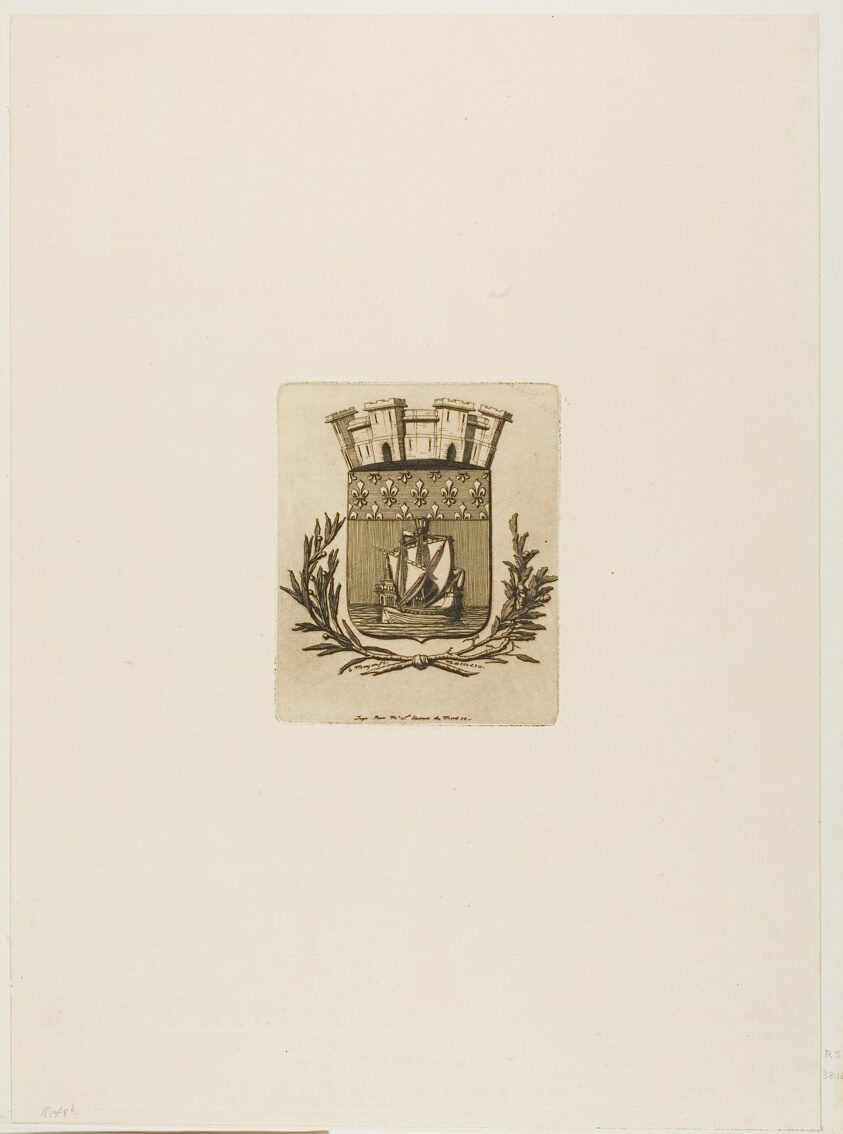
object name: Print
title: Arms Symbolical of the City of Paris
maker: Charles Meryon (French, 1821-1868)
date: 1854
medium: Etching on ivory laid paper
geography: France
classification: etching; print; prints and drawing